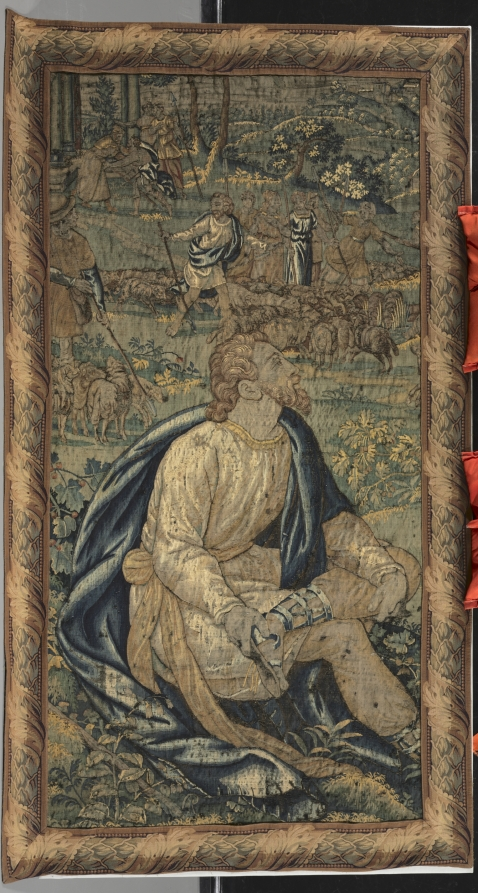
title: Moses and Jethro's Daughter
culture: Flanders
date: 1600s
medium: Wool: tapestry weave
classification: Tapestry